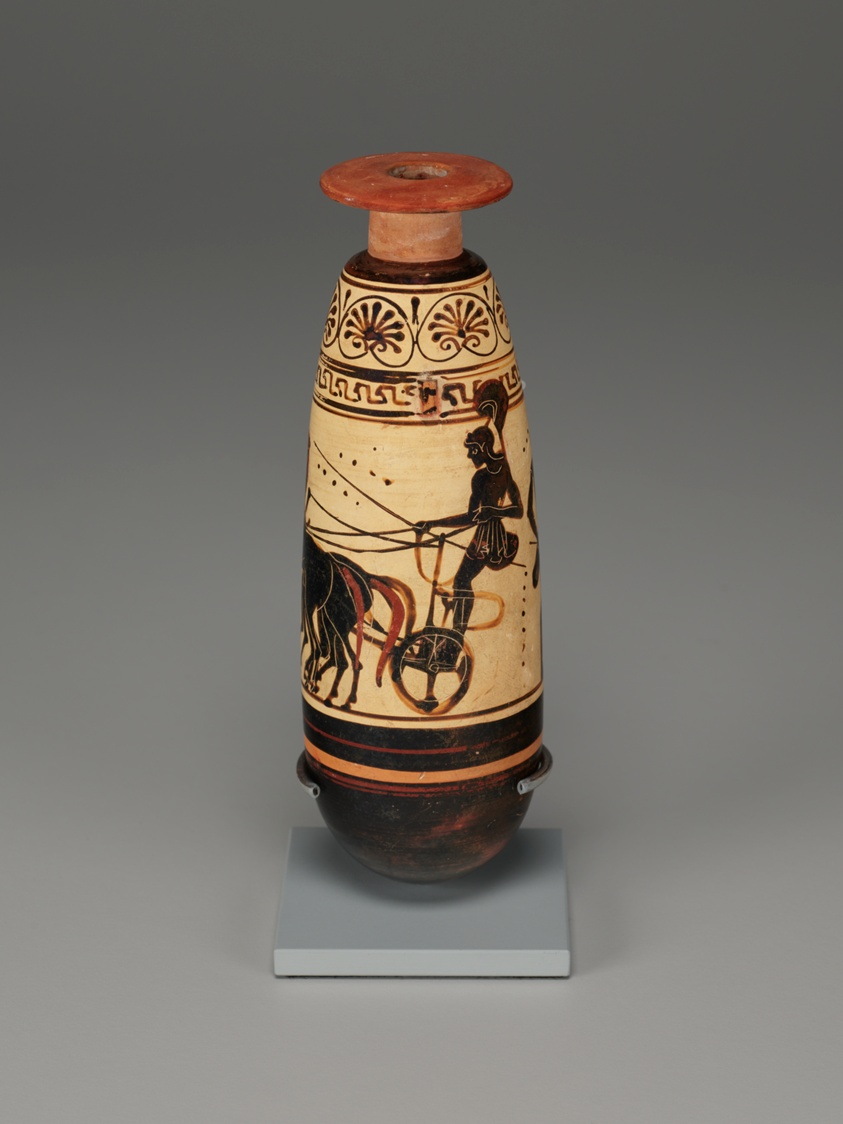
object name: Vessel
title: Alabastron (Container for Scented Oil)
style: archaic (greek), attic, ancient, greek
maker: Attributed to the Diosphos Painter; Greek; Athens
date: about 500-480 BCE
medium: terracotta, black-figure on white ground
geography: Athens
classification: vessel; ancient art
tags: mythology, beauty, rituals